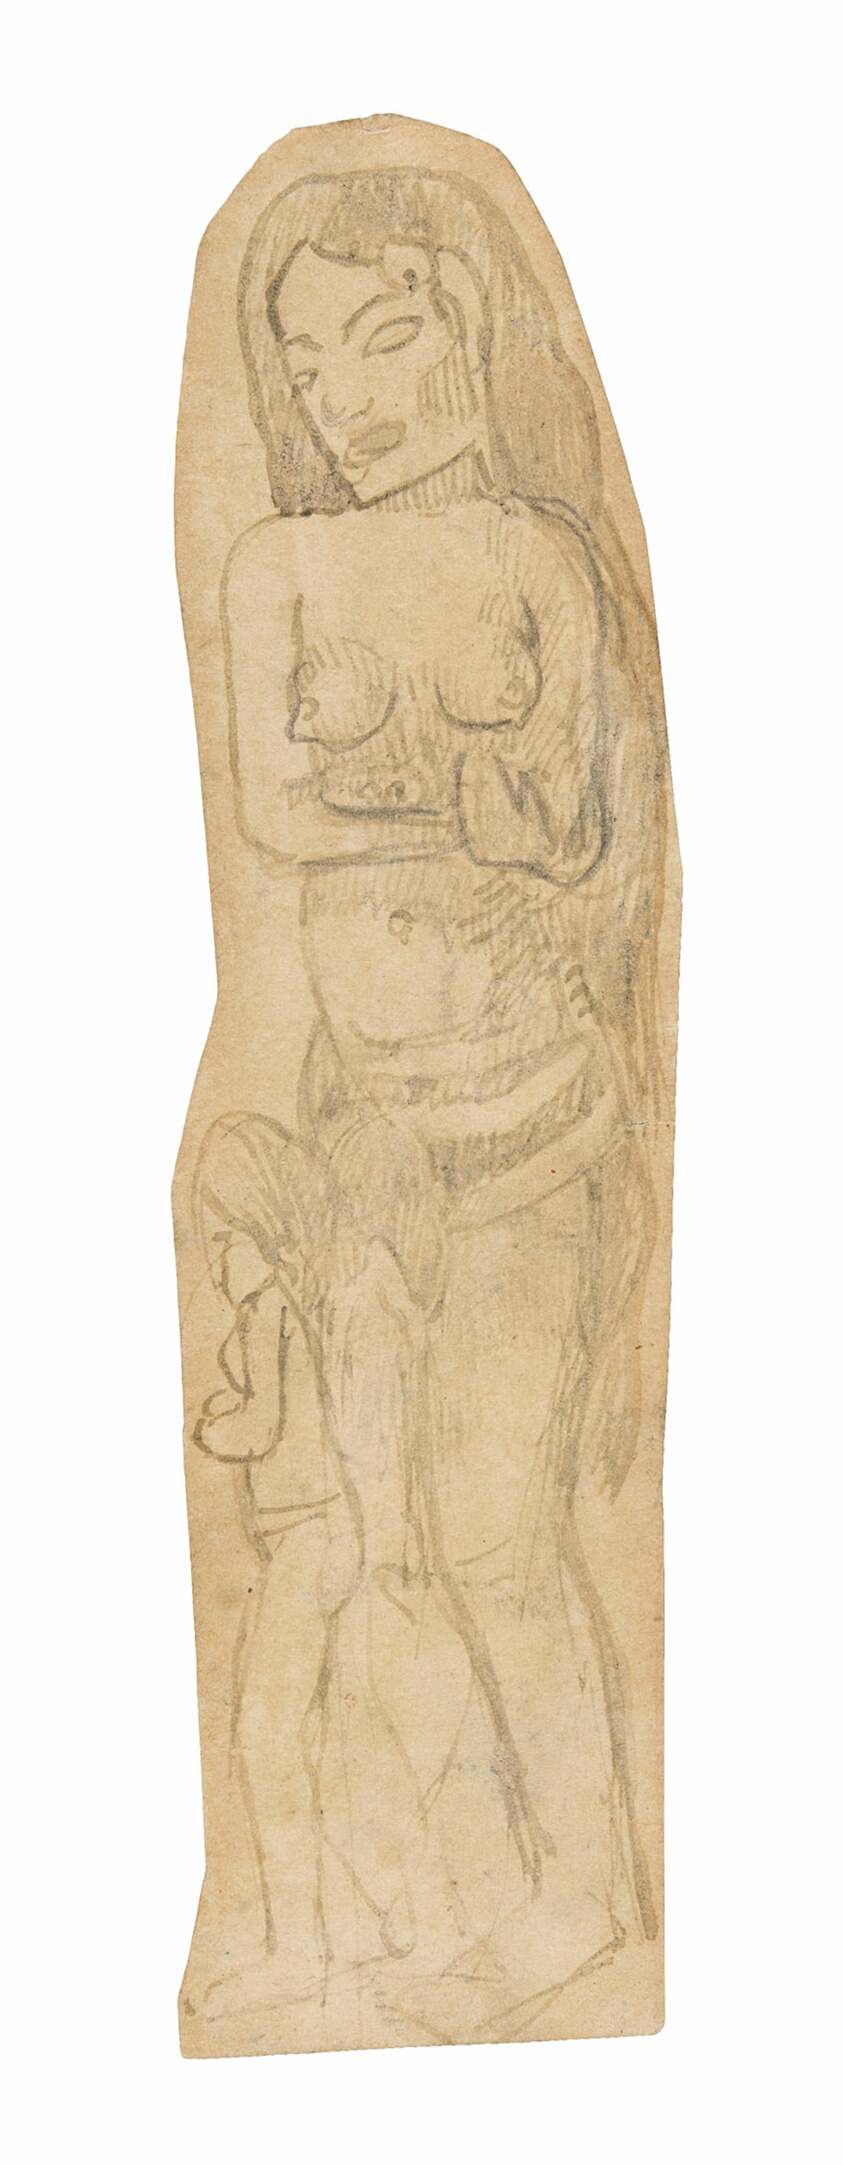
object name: Drawing and Watercolor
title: Sketch of Maori Woman and Child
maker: Paul Gauguin (French, 1848-1903)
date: 1891/93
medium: Pen and brown ink (originally purple), with touches of graphite on cream wove irregularly shaped paper, discolored to tan (removed from a sketchbook)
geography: France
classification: pen and ink drawings; drawings (visual works); prints and drawing